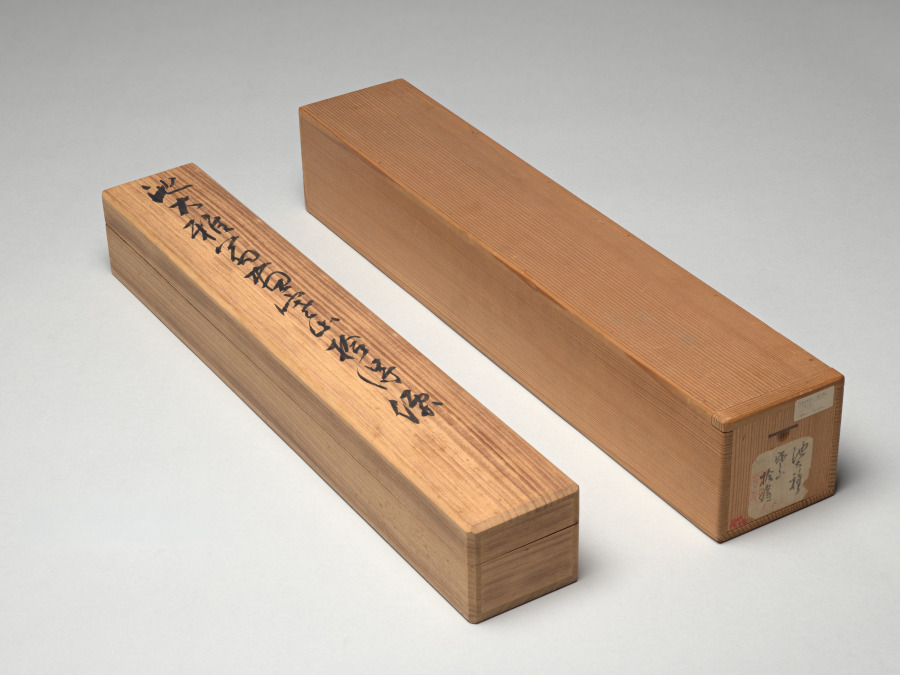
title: Hanshan and Shide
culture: Japan, Edo period (1615–1868)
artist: Ike Taiga (Japanese, 1723–1776)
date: c. 1745–76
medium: hanging scroll; ink and light color on paper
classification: Painting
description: Hanshan and Shide are a pair of individuals associated with Chan, or Zen, Buddhism who lived on Mount Tiantai in China around the 700s to early 800s. In Japan, their names are read Kanzan and Jittoku. Hanshan, whose name means “Cold Mountain,” was a monk-poet, shown reading out from a scroll of his poetry in this work. His close friend Shide, or “Foundling,” was a temple’s custodian. Here, Shide listens intently to Hanshan’s verses, his brush broom behind him.